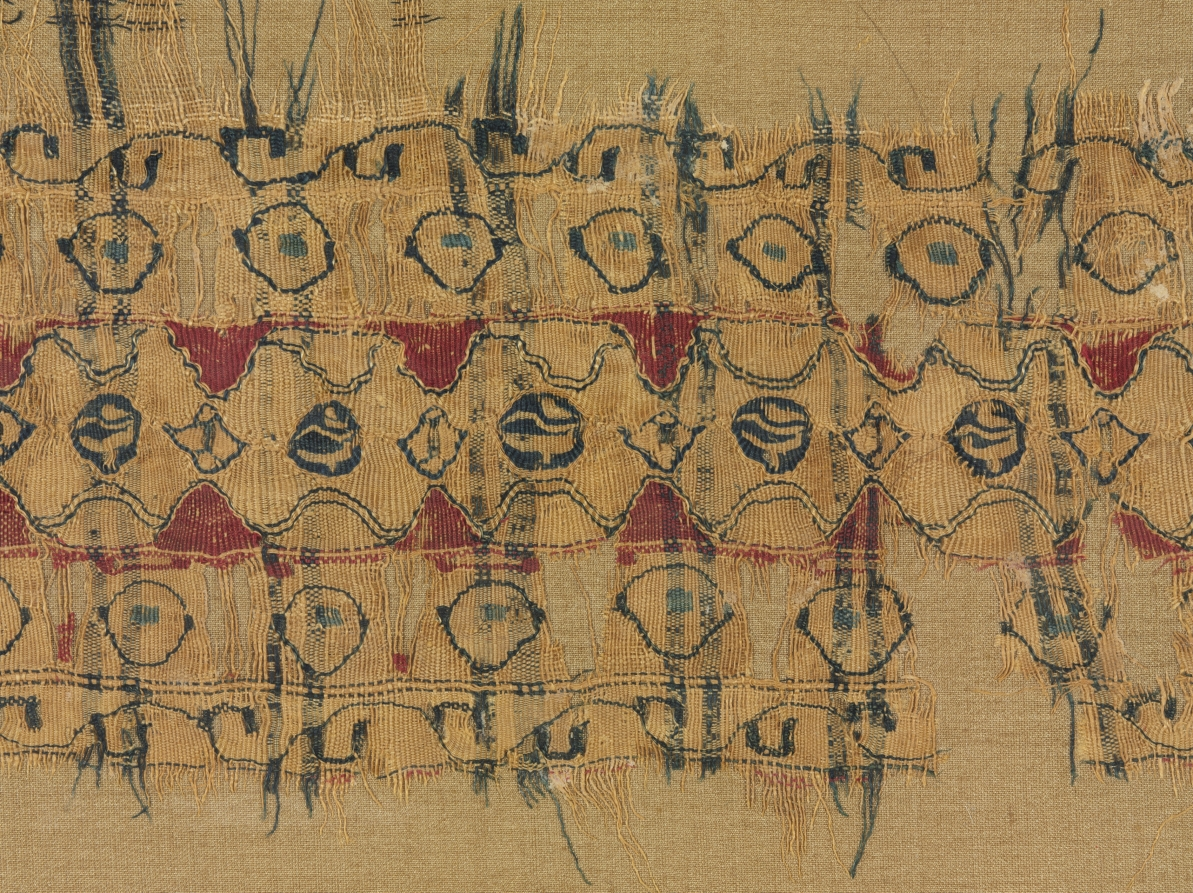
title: Plaid tiraz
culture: Egypt, Fatimid period, reign of Caliph al-Amir or al-Hafiz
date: 1101–1149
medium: plain weave with inwoven tapestry weave: linen and silk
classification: Textile